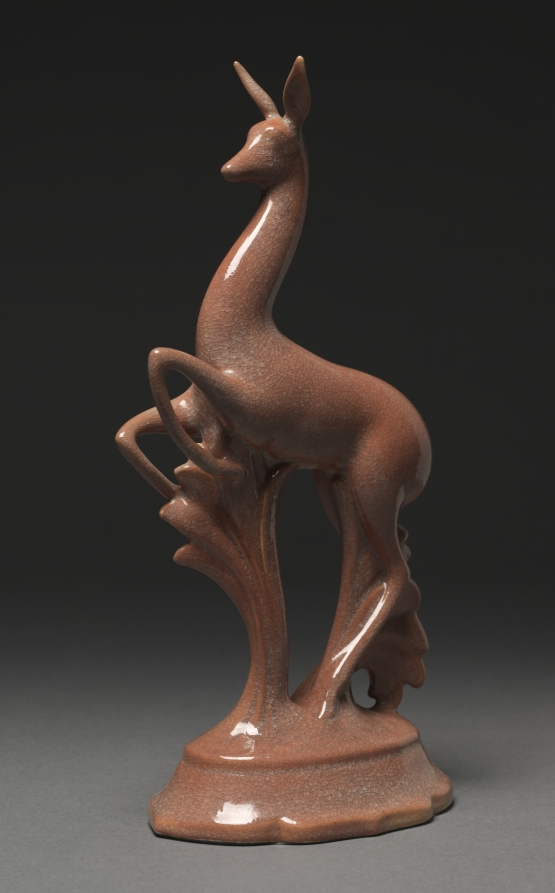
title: Fawn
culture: America, Ohio, Cleveland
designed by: Waylande Gregory (American, 1905–1971)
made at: Cowan Pottery Studio (America, Ohio, Rocky River, 1920–1931)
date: 1929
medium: earthenware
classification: Ceramic